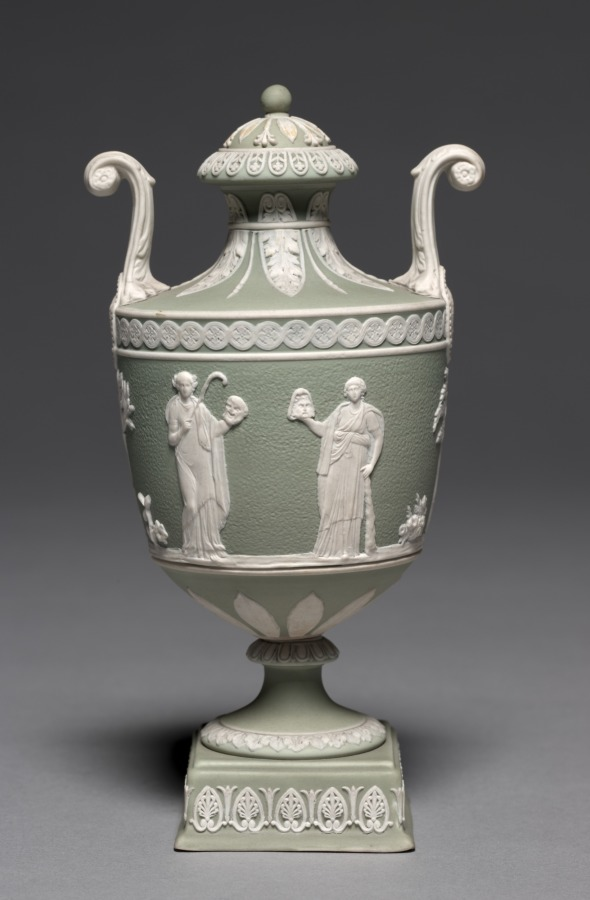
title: Pair of Covered Urns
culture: England, Staffordshire, late 18th-early 19th Century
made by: Wedgwood Factory (British)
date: c. 1800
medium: jasper ware with relief decoration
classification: Ceramic